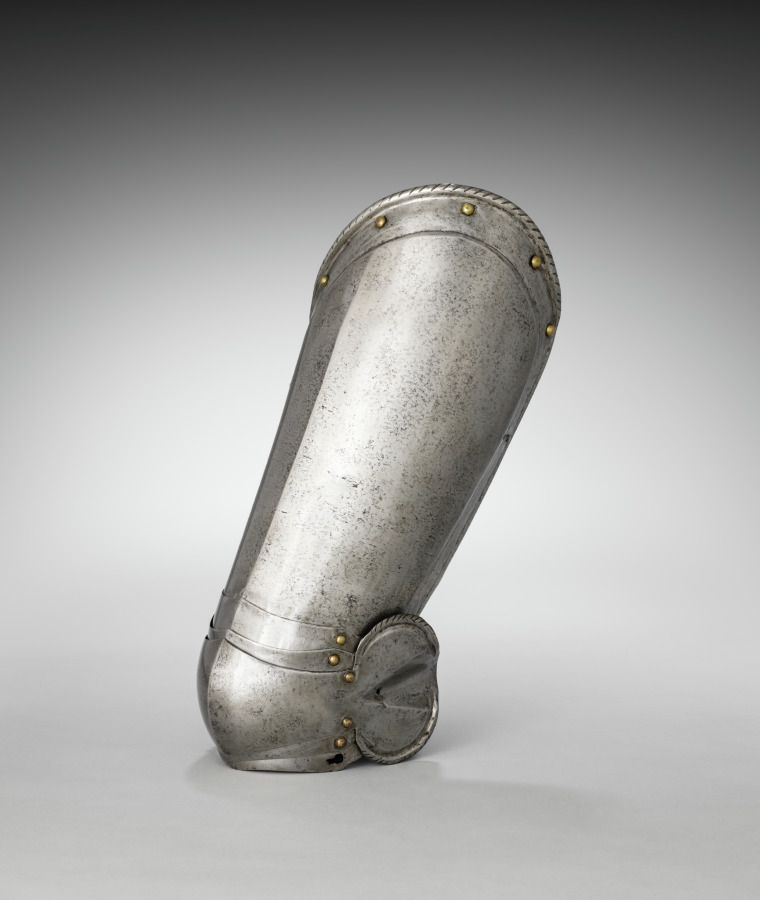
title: Proper Left Cuisse and Knee Cop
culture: South Germany, 16th century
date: c. 1560–1580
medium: steel, leather straps, brass rivets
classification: Arms and Armor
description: This armor was developed for the joust-a sporting combat between two mounted contestants. Although all of the elements of this armor date from the same period, they are not all from the same suit. This armor is thus called "composed." It also shows the asymmetry of jousting armor. The participants rode along a wall-like barrier known as a "tilt" with their left sides facing one another. Consequently, armor on that side of the body had to be thicker. Note the large plate (grandguard) over the left shoulder for extra protection. Also, the breathing holes in the helmet were placed on the right side (farthest from an opponent's lance) to avoid injuries from splinters. The bracket attached to the right breastplate is called the lance-rest, a shock-absorbing support designed to accommodate the lance when "couched" under the right armpit.